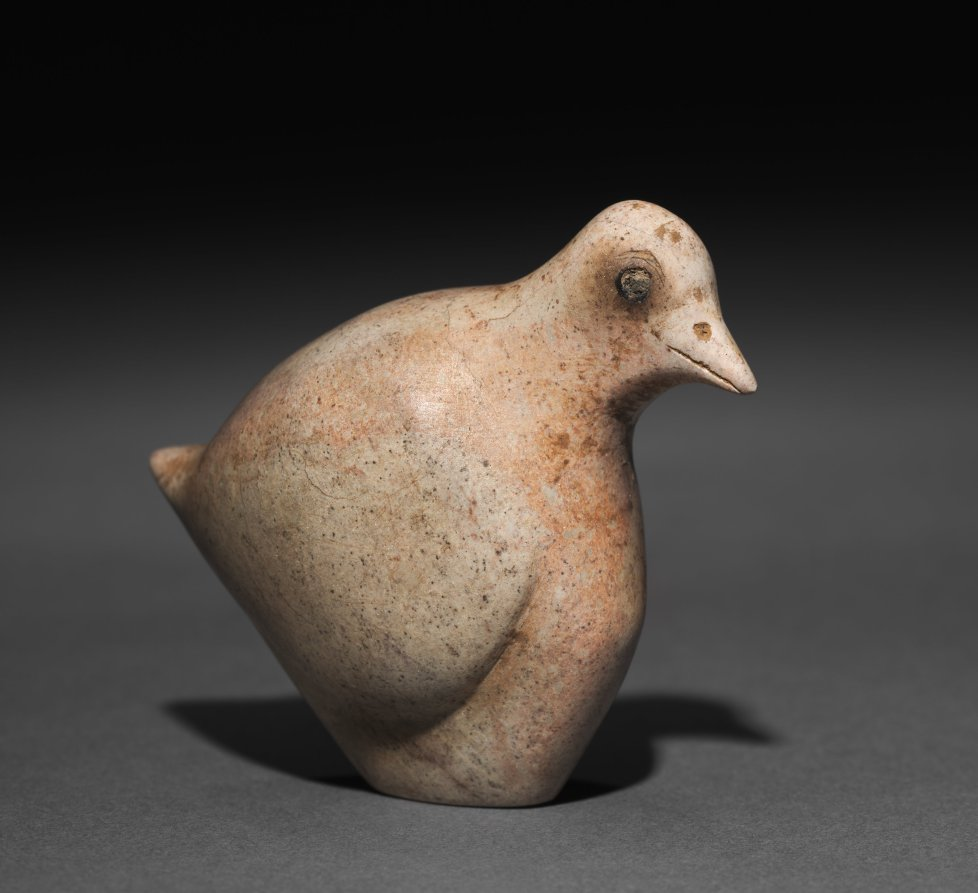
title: Nesting Quail Stamp Seal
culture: Iran, Lake Van region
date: 4000–3000 BCE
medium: dickite stone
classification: Sculpture